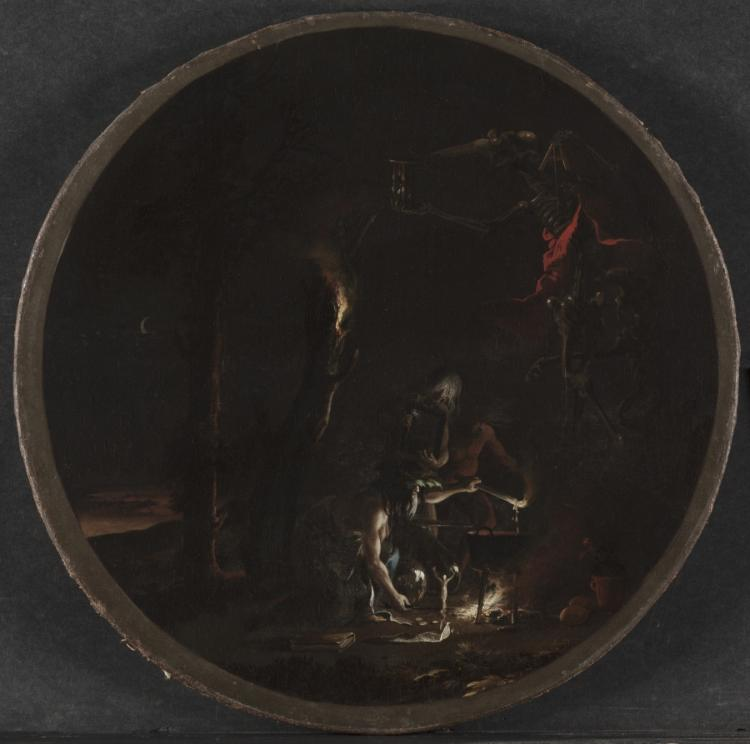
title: Scenes of Witchcraft: Evening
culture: Italy, 17th century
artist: Salvator Rosa (Italian, 1615–1673)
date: c. 1645–49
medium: oil on canvas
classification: Painting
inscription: Signed: "SR [monogram]"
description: At dusk, Rosa's hags gather around a cauldron. Above their incantations soars a conjured skeleton holding an hourglass symbolizing the brevity of life. In its left hand, the demonic creature holds a capital letter A from which extends a plumb line; as ancient signs of the moon and judgment, this strange combination of symbols embodies the nocturnal judgment the witches are doling out below. Though more rare in paint, the detailed portrayal of witches at their spells enjoyed a long literary tradition. The wax effigy alludes to classical literature by Virgil and Horace that described love magic. Poets in the 1500s and 1600s continued the tradition, writing verse about witches concocting potions and performing love spells. In Rosa's own poem "La Strega (The Witch)," the jilted Phyllis vows to take revenge on her feeble lover, listing the ingredients for her black magic: "ground powders, mystic gems, snakes and owls, stinking blood. . . ." Painting was considered "mute poetry" in the 1600s, and Rosa often explored the same themes in his written and painted art—a clever way to gain fame as a unique intellect.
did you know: The artist chose the painting's shape to reference the foundational role of the circle in practicing magic.